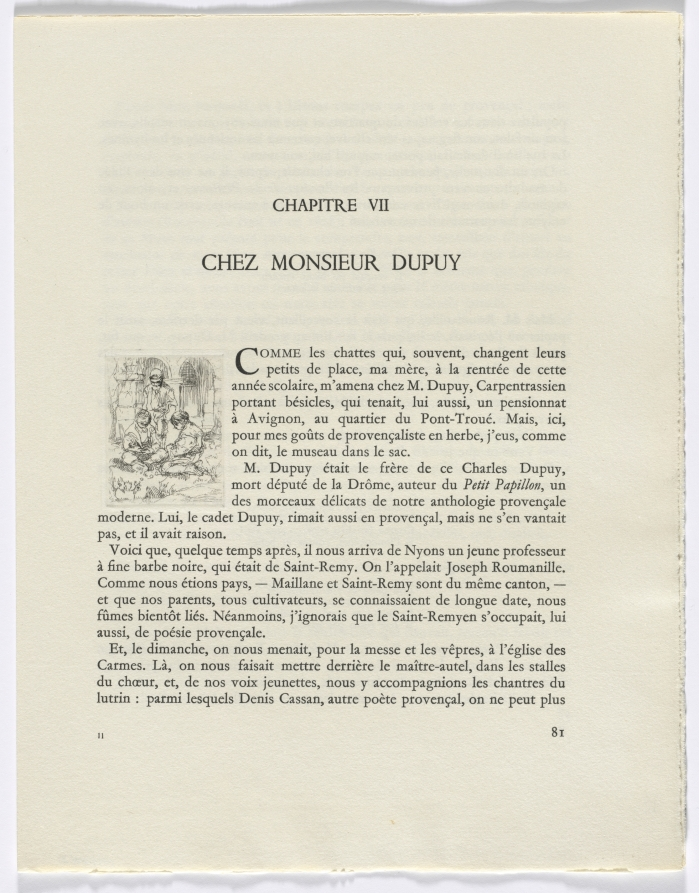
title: Frédéric Mistral: Mémoires et Recits by Frédéric Mistral: three figures (page 81)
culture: France, 20th century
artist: Auguste Brouet (French, 1872–1941)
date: 1937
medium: etchings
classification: Portfolio